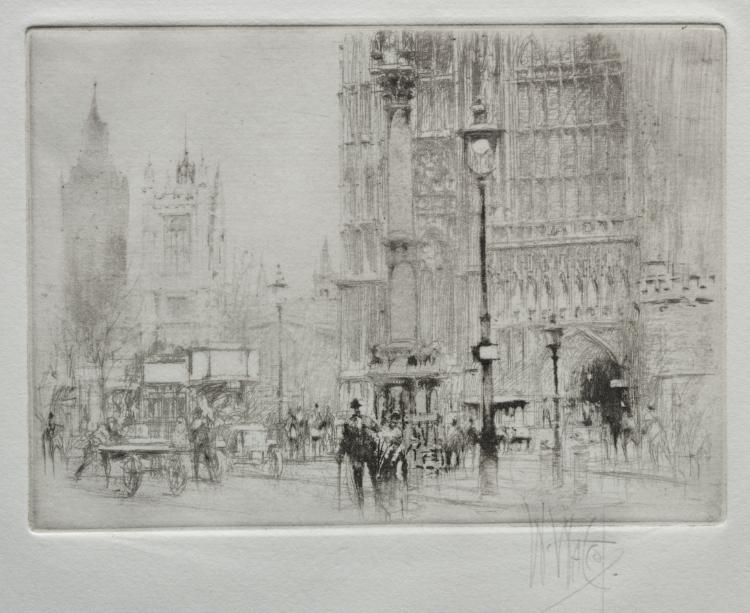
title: Westminster Abbey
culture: England, 20th century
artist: William Walcot (British, 1874–1943)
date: 1919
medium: etching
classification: Print